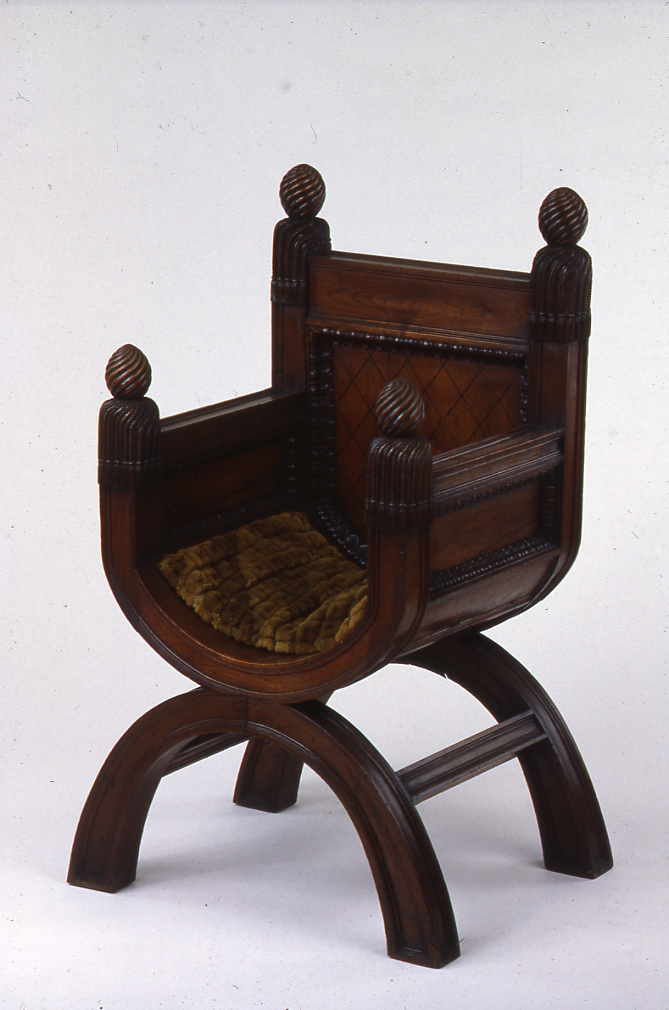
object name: Furniture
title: X-Frame Armchair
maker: Designed by Lewis Nockalls Cottingham (English, 1787-1847); Possibly after T. F. Hunt (Scottish, c. 1791-1831); England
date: 1840/45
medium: Sweet chestnut and wool cushion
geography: England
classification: seating; furniture; european decorative arts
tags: furniture